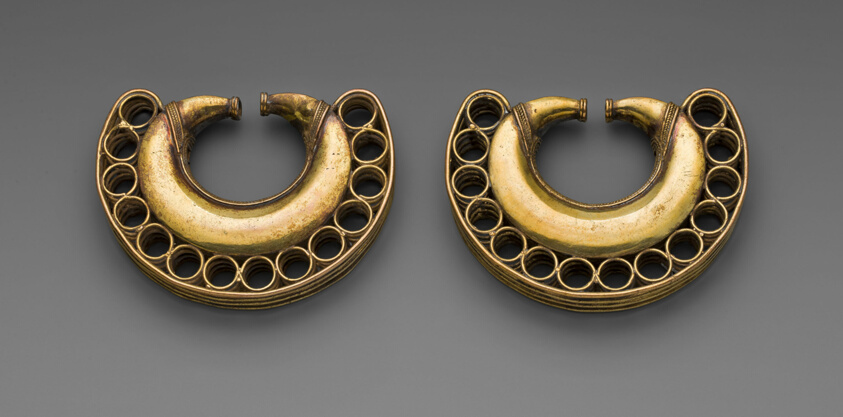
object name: Costume and Accessories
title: Pair of Earrings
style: tairona, native american, americas, lower central america, Arts of the Americas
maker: Artist unknown (Tairona); Sierra Nevada de Santa Marta, Colombia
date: 1000–1500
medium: Gold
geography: Sierra Nevada de Santa Marta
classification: jewelry; metal; costume; art of the americas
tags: jewelry, costume, geometric, patterns